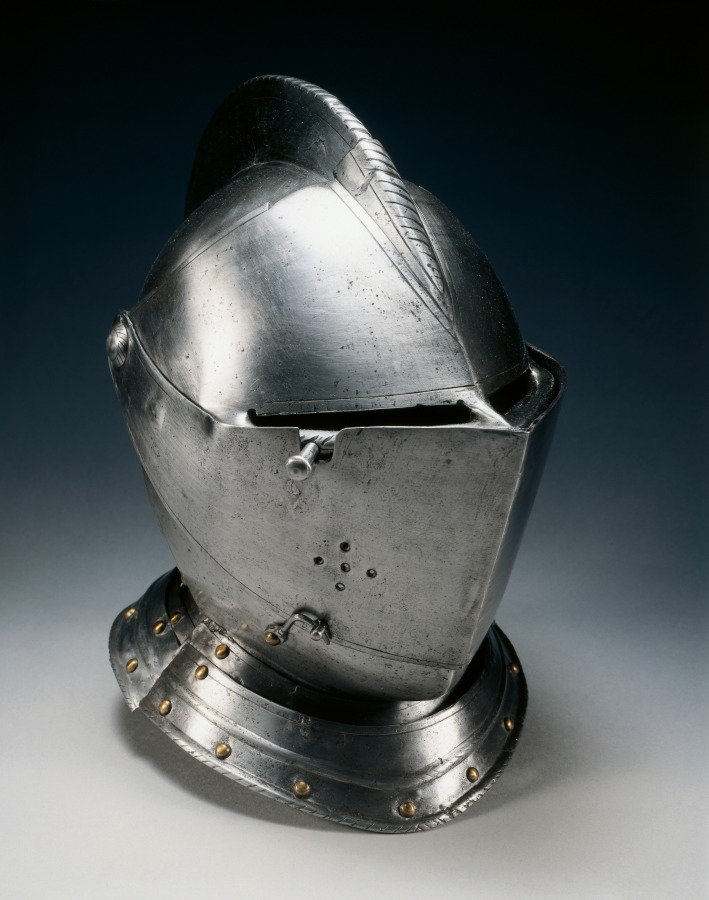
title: Suit of Armor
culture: Germany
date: c.1550–70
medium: iron, steel, leather and brass rivets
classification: Arms and Armor